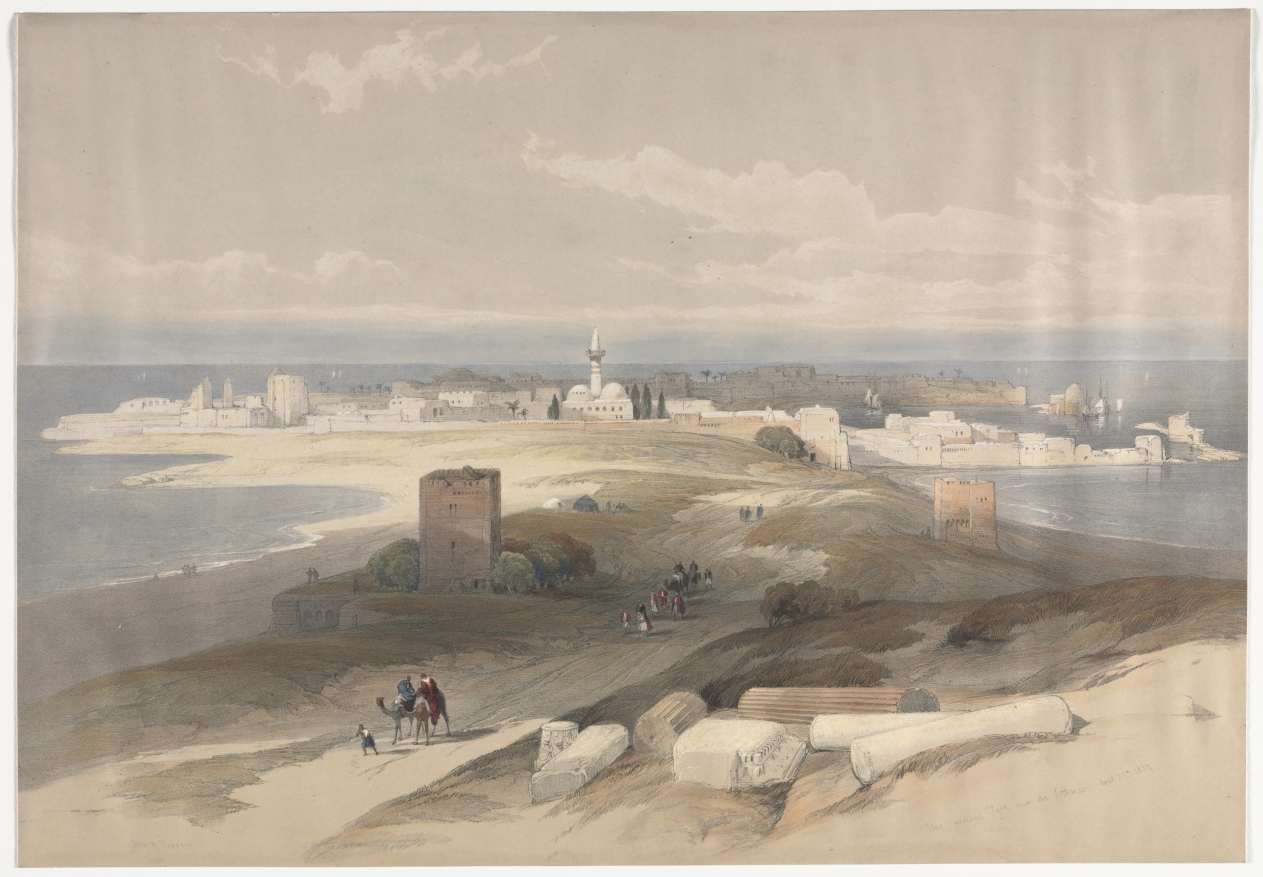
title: Sur or Tsor, Ancient Tyre from the Isthmus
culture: England, 19th century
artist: David Roberts (Scottish, 1796–1864)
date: 1839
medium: color lithograph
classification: Print